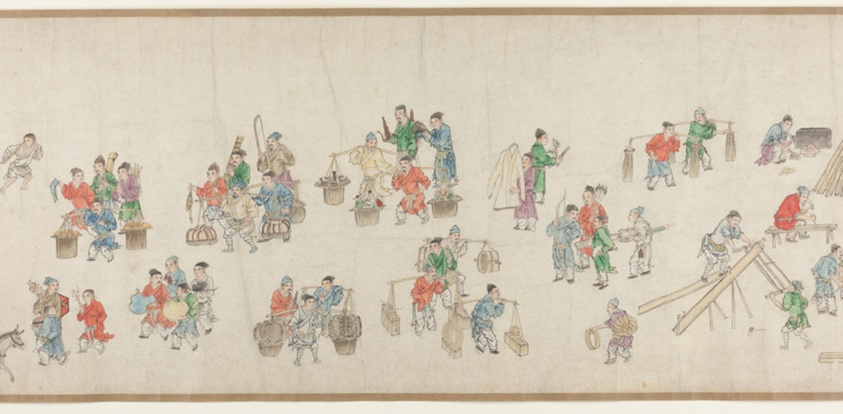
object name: Painting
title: Street Scenes in Times of Peace 太平風會圖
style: Chinese (culture or style)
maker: Zhu Yu (Zhu Junbi) 朱玉（朱君璧）; Chinese, 1293-1365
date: Yuan dynasty (1279–1368), 14th century 元朝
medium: Handscroll; ink and colors on paper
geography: China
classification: handscroll; painting; asian art